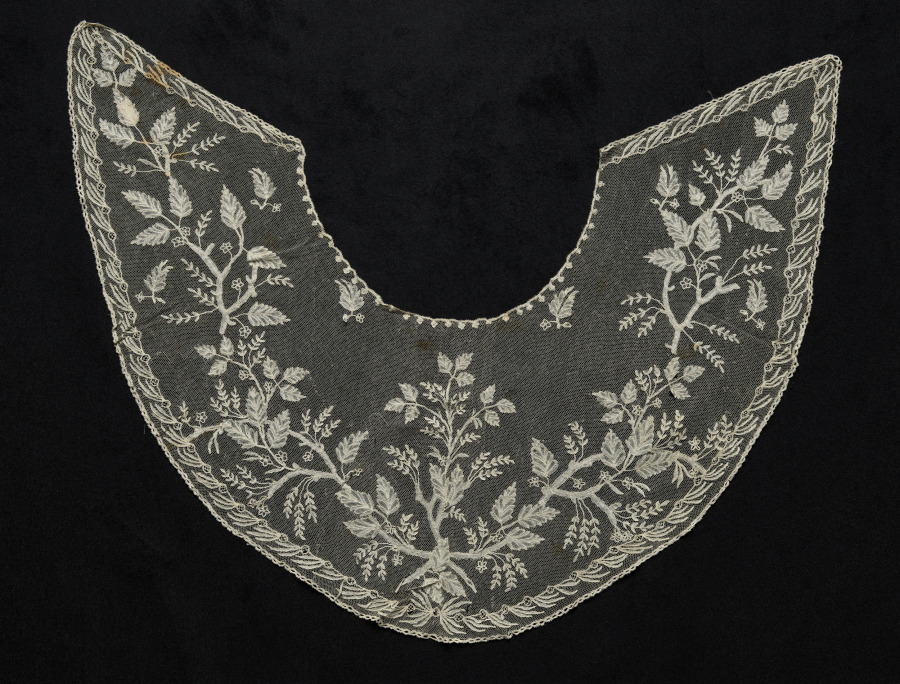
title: Lace Collar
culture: Belgium (Flanders)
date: 1800–1820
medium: Bobbin lace (net lace) with appliqué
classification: Lace